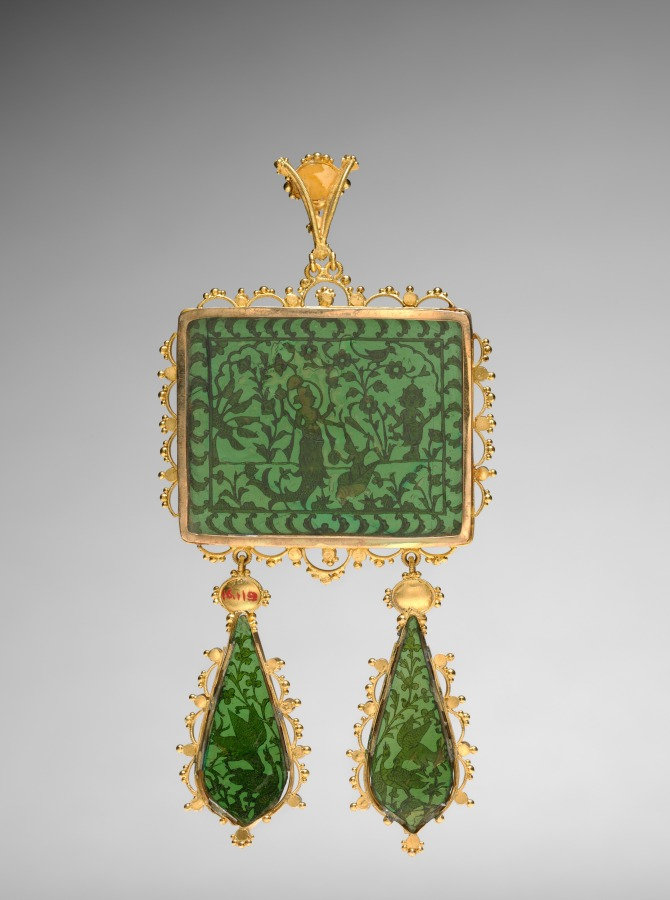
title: Pendant with Matsya (fish incarnation of Vishnu) defeating Hayagriva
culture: Northwestern India, Rajasthan Pratapgarh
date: 1800s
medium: gold, enamel, emeralds, and pearls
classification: Jewelry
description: Three emeralds and many pearls surround the central part of this pendant, which features a scene from the life of Matsya at the center. The fish incarnation of the preserver god Vishnu, Matsya appears in the middle, defeating the demon Hayagriva, who emerges from a shell, grasping him by the hair. Encircling the battle are plants, flowers, and designs indicative of ocean waves. The four-headed god Brahma also watches from the left side. Below the main scene, two smaller teardrop-shaped ornaments hang down. They feature scenes of predator birds, which may allude to the courtly falcon hunts of rulers.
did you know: In Matsya’s upper hands he holds two of Vishnu’s implements: the mace and the lotus.